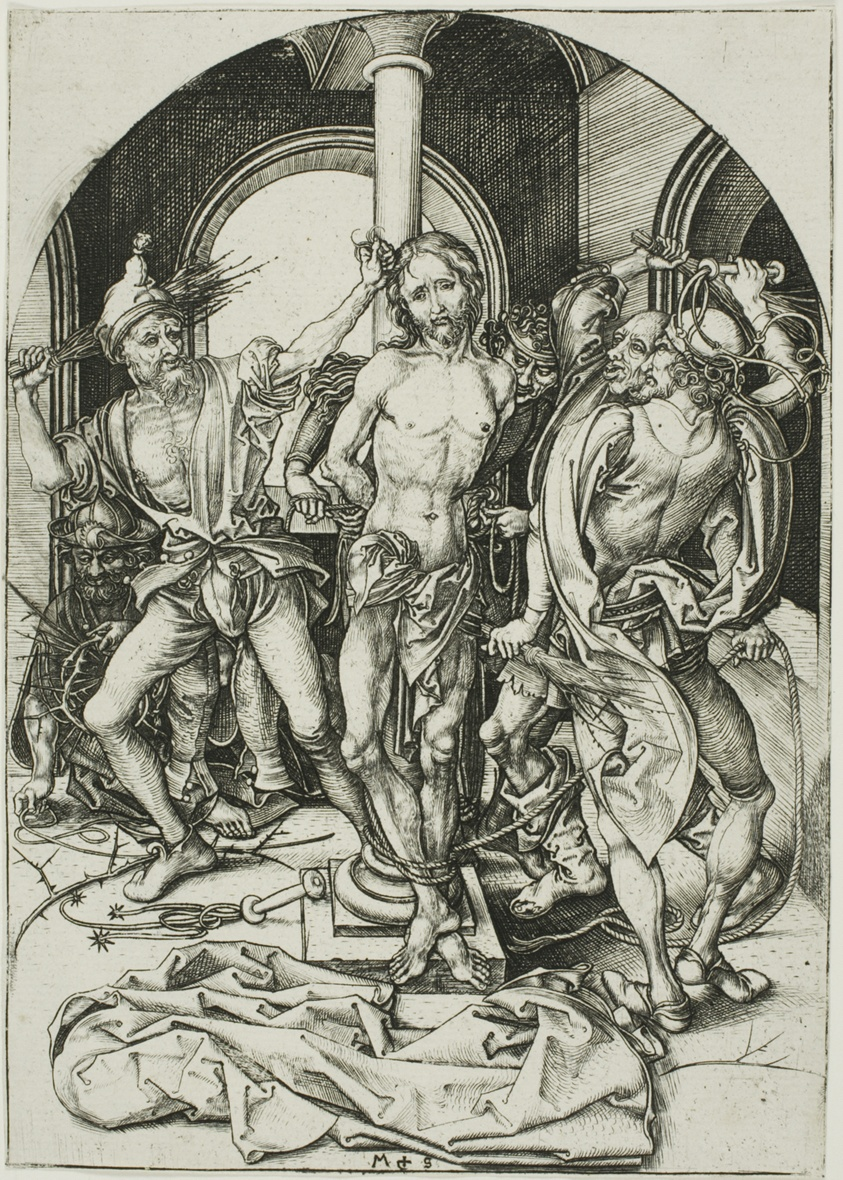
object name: Print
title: The Flagellation, from The Passion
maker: Martin Schongauer (German, c. 1430/50-1491)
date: c. 1480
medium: Engraving on paper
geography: Germany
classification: engraving; print; prints and drawing